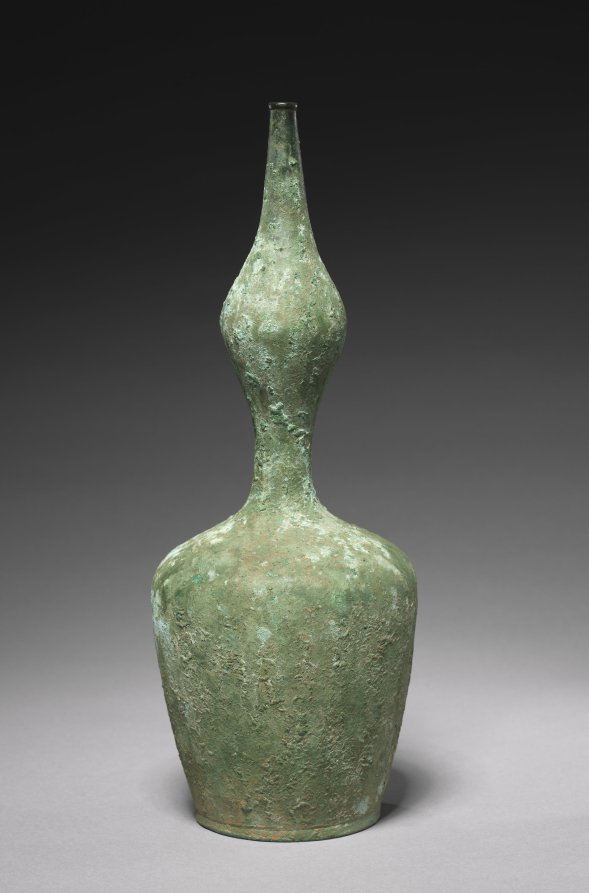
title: Gourd-Shaped Bottle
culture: Korea, Goryeo dynasty (918–1392)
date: 918–1392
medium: bronze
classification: Metalwork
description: As early as the seventh century, the practice of drinking tea and wine became an important part of elite culture in Korea. Elites of the Goryeo period commissioned a variety of types of ceramic and metal utensils including this bronze bottle, not only to make their drinking experience more exciting, but also to show their appreciation of nature.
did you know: This gourd-shaped bottle may have been used to serve wine.